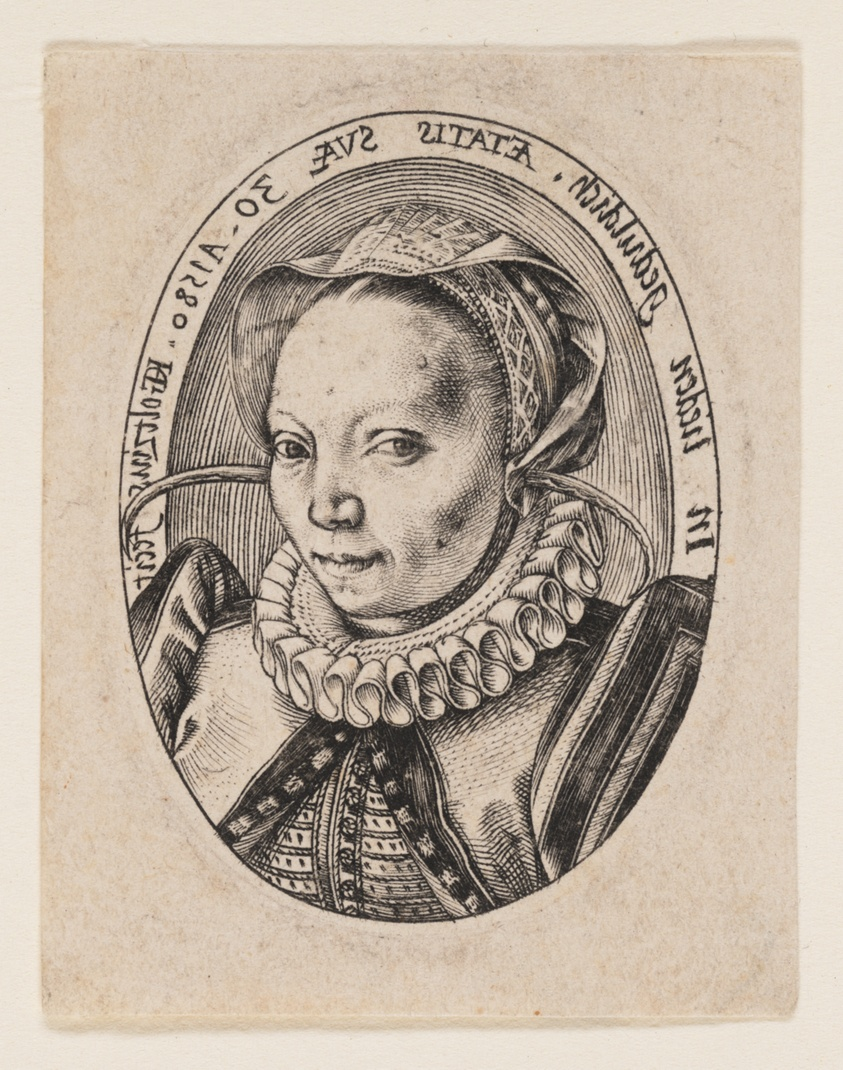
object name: Print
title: Grietgen Jansdochter, wife of the artist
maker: Hendrick Goltzius (Dutch, 1558–1617)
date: 1580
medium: Engraving on paper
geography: Netherlands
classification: engraving; paper; print; prints and drawing